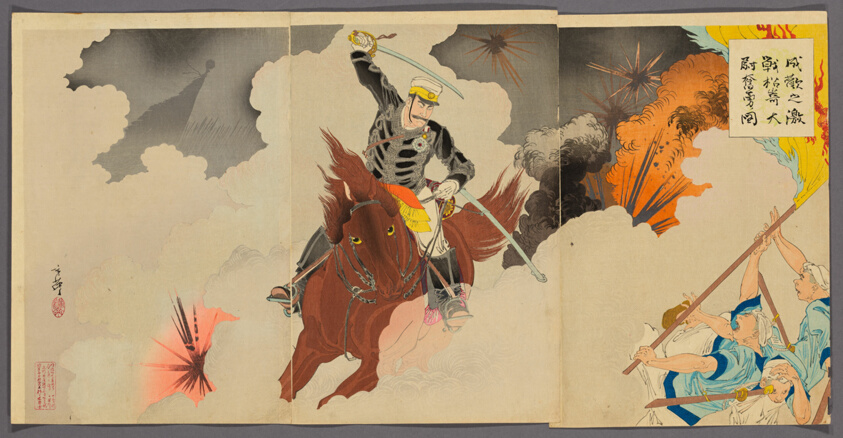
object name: Print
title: Captain Matsuzaki Bravely Fights at the Great Battle of Songhwan (Seikan no Gekissen, Matsuzaki Taii funyu no zu)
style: Japanese (culture or style)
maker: Migita Toshihide (Japanese, 1863-1925)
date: 1894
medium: Color woodblock print; oban triptych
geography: Japan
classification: woodblock print; print